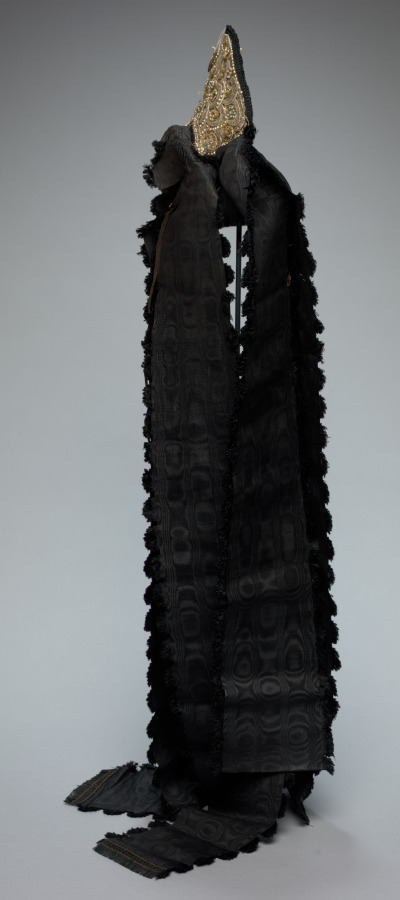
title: Headdress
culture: Germany, Swabia, 18th century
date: 1700s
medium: embroidery, decorated with silver thread, imitation pearls, colored stones, and streamers of moiré ribbon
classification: Garment